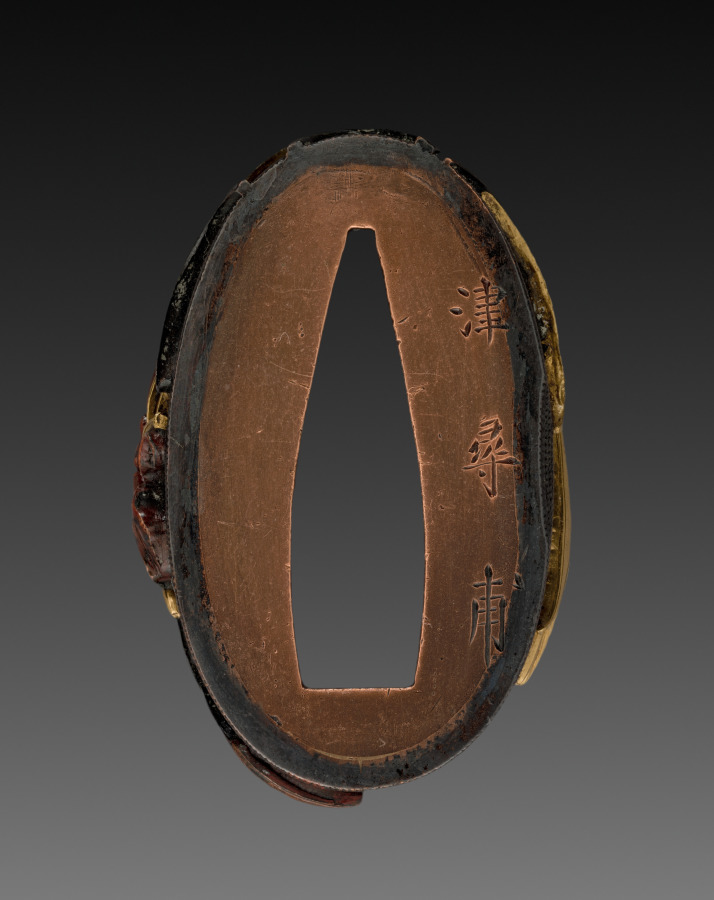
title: Sword-Hilt Collar (Fuchi) with Lily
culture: Japan, Edo period (1615–1868)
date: 1700–1850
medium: shakudo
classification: Arms and Armor